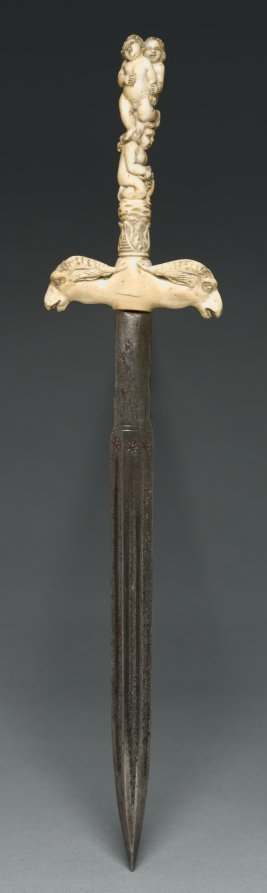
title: Dagger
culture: Italy, late 17th Century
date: late 1600s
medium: steel and ivory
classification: Arms and Armor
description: The carved grip of this dagger depicts the female followers of Bacchus, the Roman god of wine.